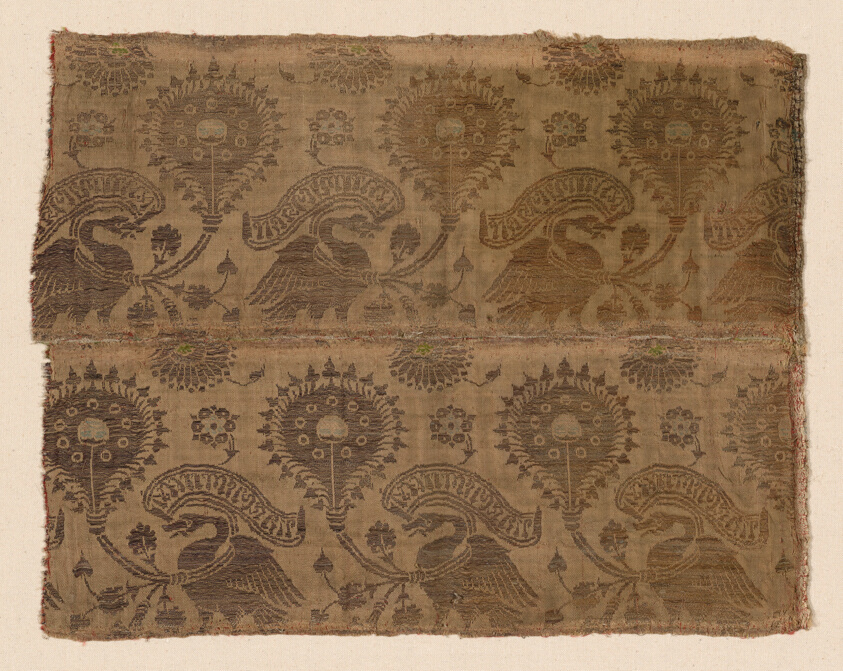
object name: Textile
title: Fragment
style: Renaissance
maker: Italy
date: Late 14th/15th century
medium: Silk and gilt-animal-substrate-wrapped linen, warp-float faced 3:1 twill weave with supplementary patterning wefts bound by secondary binding warps in (weft-float faced 1:3) twill interlacings (on reverse face secondary binding warps and supplementary wefts form detached interlacing)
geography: Lucca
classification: textile; weaving